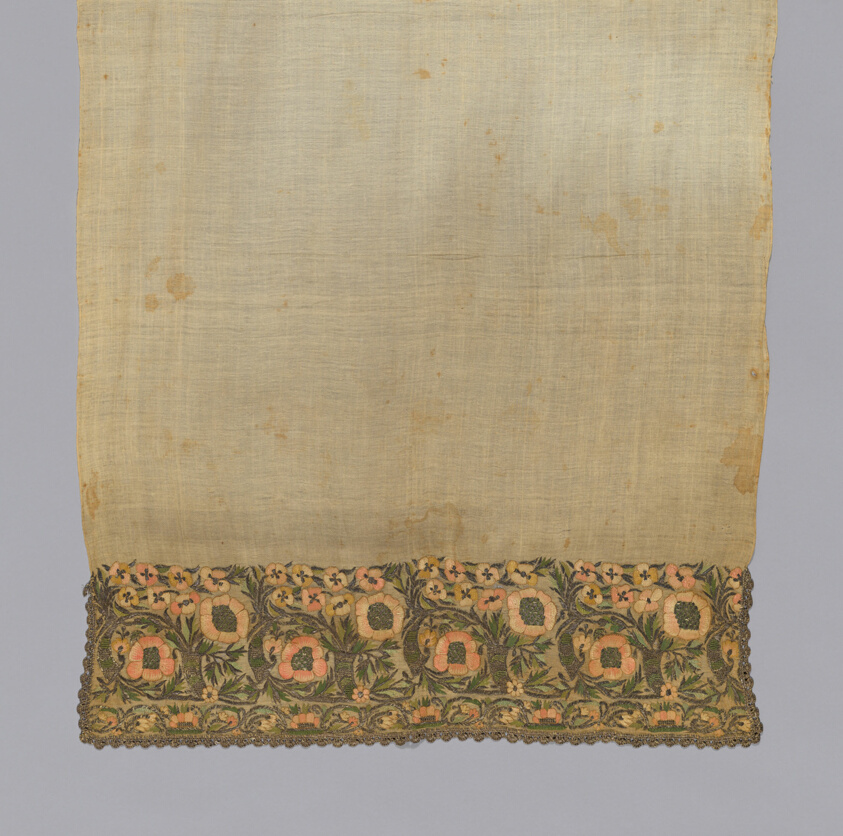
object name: Textile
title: Towel or Napkin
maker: Turkey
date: 19th century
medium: embroidered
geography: Turkey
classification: textile; needlework (visual works); weaving